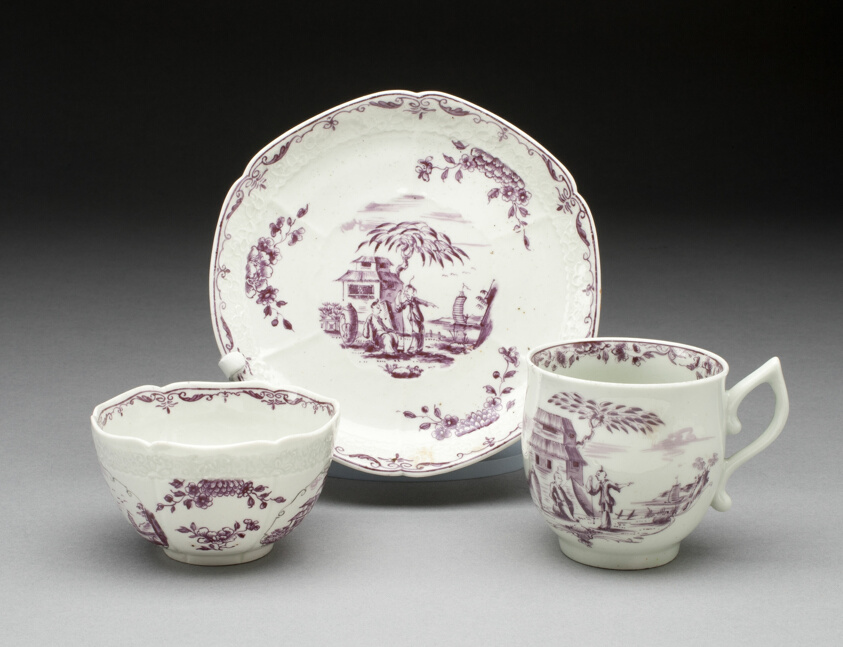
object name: Ceramics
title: Tea Bowl, Coffee Cup, and Saucer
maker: Worcester Porcelain Factory (Warmstry House Period, 1751–1783); Worcester, England, founded 1751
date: c. 1760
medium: Soft-paste porcelain, purple monochrome enamel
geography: Worcester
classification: drinking vessel; teaware; ceramics; porcelain; european decorative arts